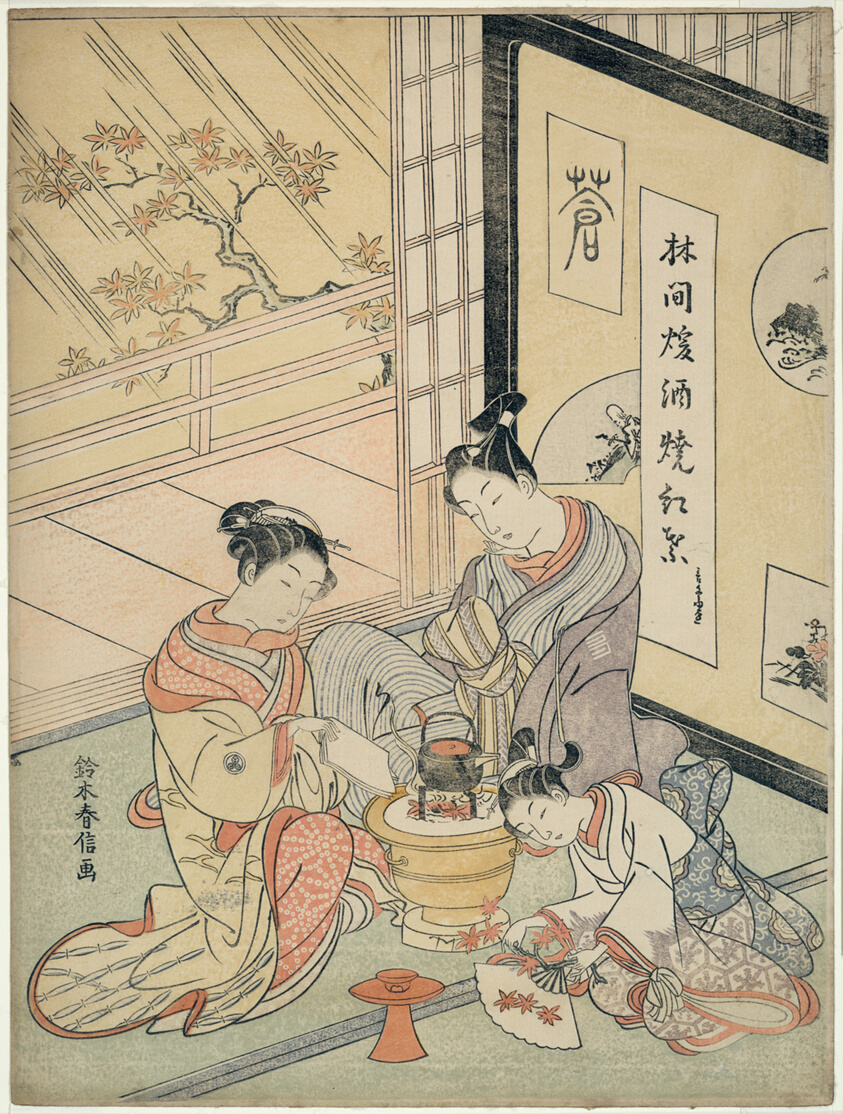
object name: Print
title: Burning Maple Leaves to Heat Sake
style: Japanese (culture or style)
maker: Suzuki Harunobu 鈴木 春信; Japanese, 1725 (?)-1770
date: c. 1768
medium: Color woodblock print; chuban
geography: Japan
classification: woodblock print; print; asian art